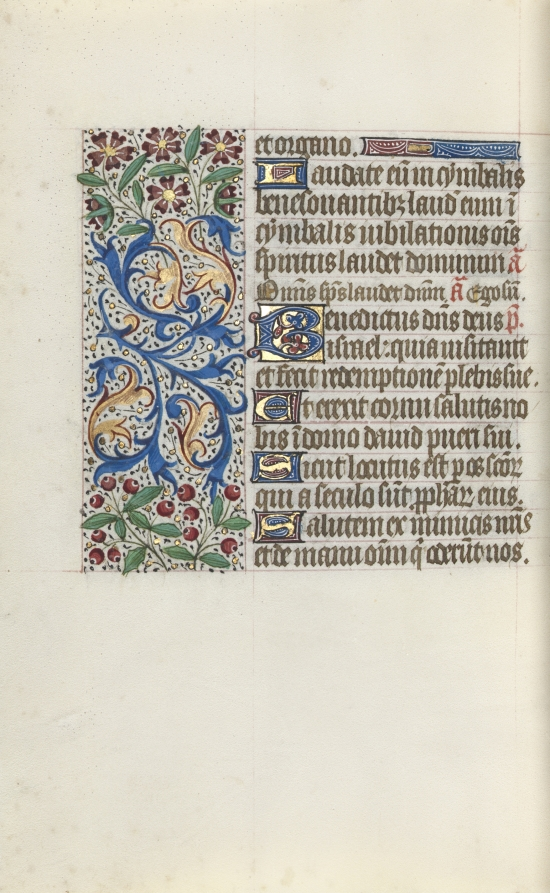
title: Book of Hours (Use of Rouen): fol. 143v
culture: France, Rouen, 15th century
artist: Master of the Geneva Latini (French, active Rouen, 1460–80)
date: c. 1470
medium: ink, tempera, and gold on vellum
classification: Bound Volume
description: In the late 1400s and early 1500s Rouen was an established and important center of book production. The city’s cathedral had a wealthy chapter that spent large sums of money to commission books and to maintain its extensive library. The stationers and booksellers would have likely been concentrated in or near the cathedral precinct. This artist, named after a manuscript now in Geneva, was Rouen’s principal illuminator during the second half of the 1400s.